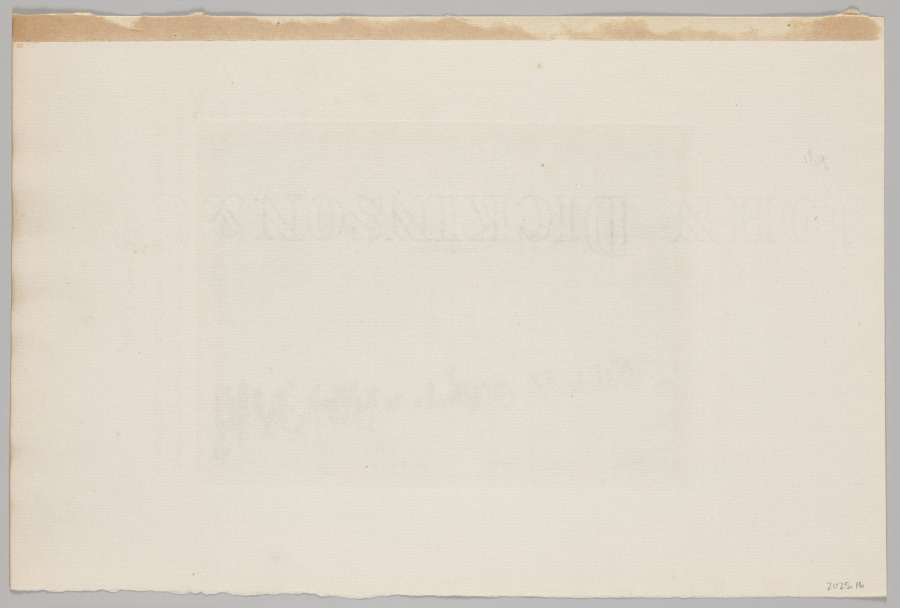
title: Marsh Weeds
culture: England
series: Marsh Leaves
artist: Peter Henry Emerson (British, 1856–1936)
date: before 1891, published 1895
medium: photogravure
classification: Photograph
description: Emerson’s early photographs emphasized naturalism, but his late works such as this one demonstrate influences from Japanese art, French Impressionism, and the painting and graphic art of Whistler, who was a personal acquaintance. This looser, more expressionistic, and emotional late style helped lay the groundwork for Pictorialist photography (for example, see 1980.141), the movement that succeeded in getting photography more widely accepted as a fine art.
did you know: Around the time Emerson made this image, one of his most artistic, he wrote that he no longer believed photography to be an art form.